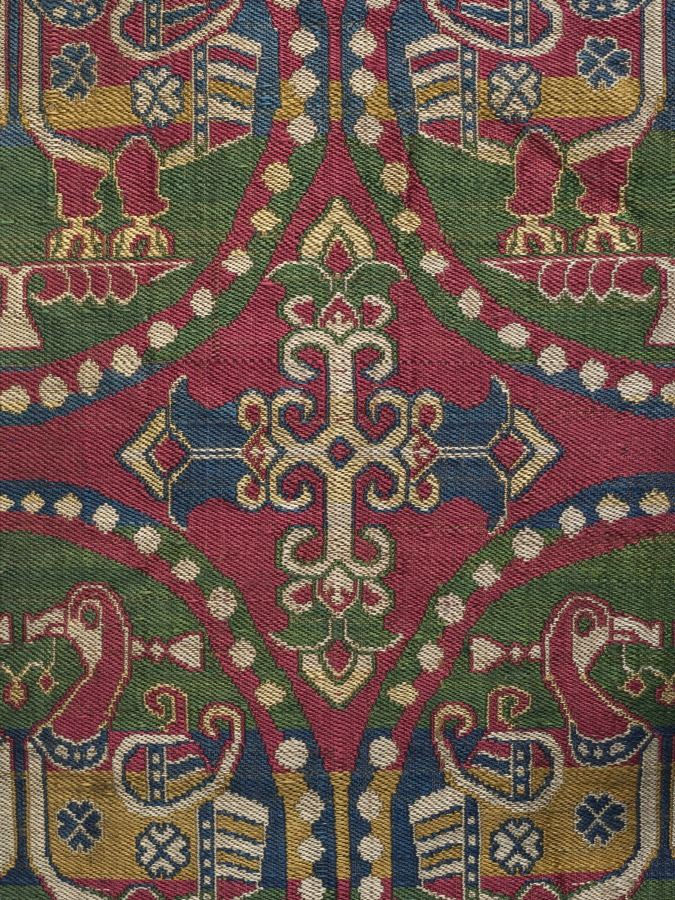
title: Child’s Coat with Ducks in Pearl Medallions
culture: Probably Sogdia (present-day Uzbekistan); China, Tang dynasty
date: 700s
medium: Silk: weft-faced compound twill weave (samite)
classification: Garment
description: The coat’s outer fabric is woven in five brilliant colors featuring paired ducks in pearl roundels, hallmarks of the precious and highly desired silks from Sogdia. The coat’s inner lining is a twill damask with a floral pattern made in China. The combination of Sogdian and Chinese silks in one garment with Tibetan ownership history is evidence of the vital exchange and cultural interaction among the peoples living along the trade routes of the Silk Road. This precious coat was presumably made for a Tibetan prince. Given the coat’s pristine condition, though, it is unclear whether the garment was ever worn, or was used as a diplomatic gift or perhaps as currency.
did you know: This coat is part of a set of garments that originally included an outer pair of pants and silk boots made from the same fabric.